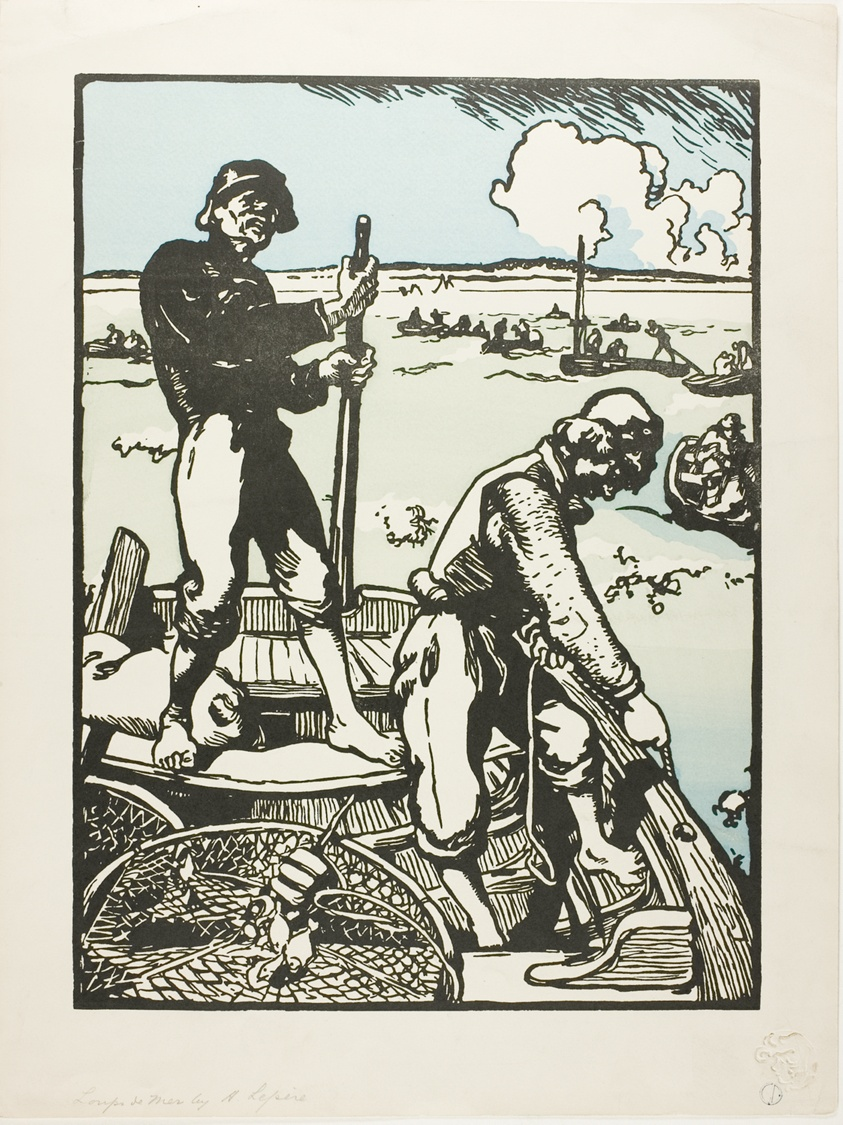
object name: Print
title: Shrimpers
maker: Louis Auguste Lepère (French, 1849-1918)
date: 1895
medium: Photolithograph reduced from a woodcut in black, blue and green on cream wove paper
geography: France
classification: photo lithograph; print; prints and drawing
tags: dogs, animals